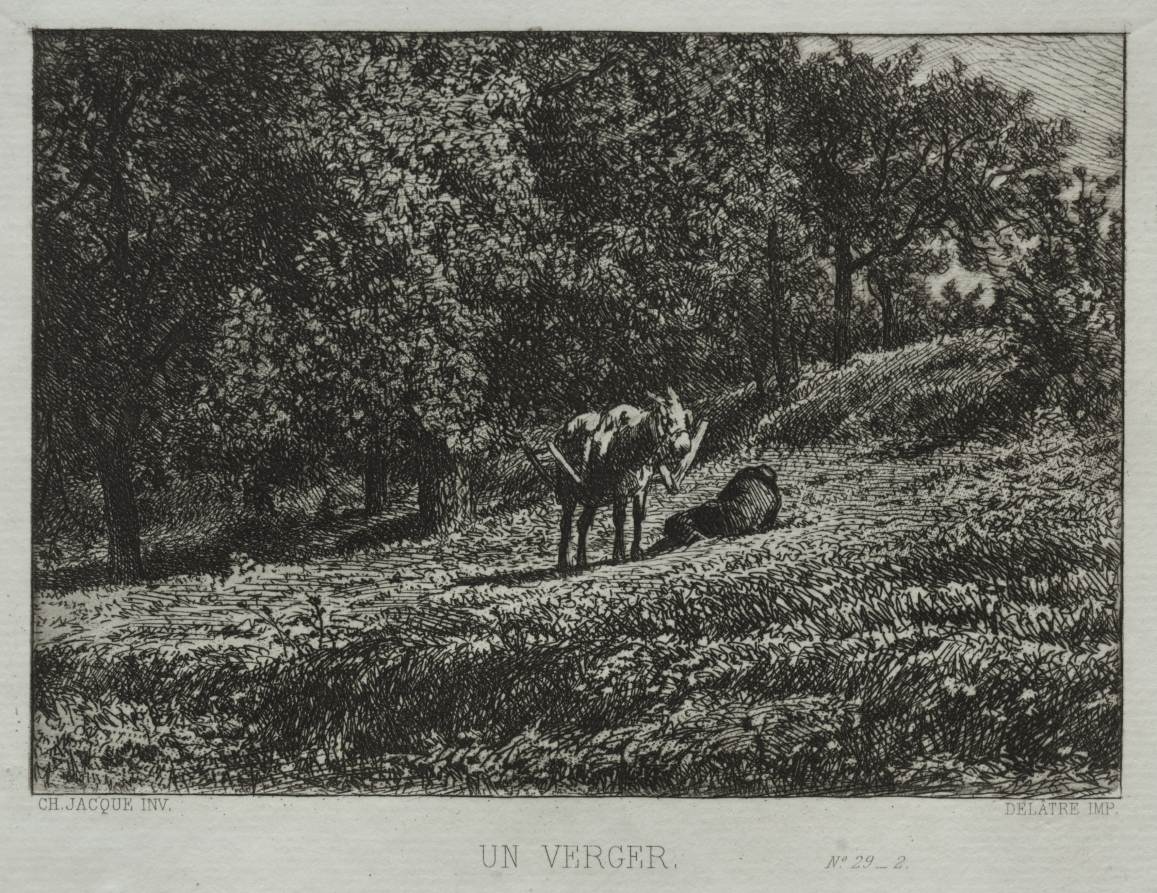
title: An Orchard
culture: France, 19th century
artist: Charles-Émile Jacque (French, 1813–1894)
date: 1865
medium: etching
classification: Print